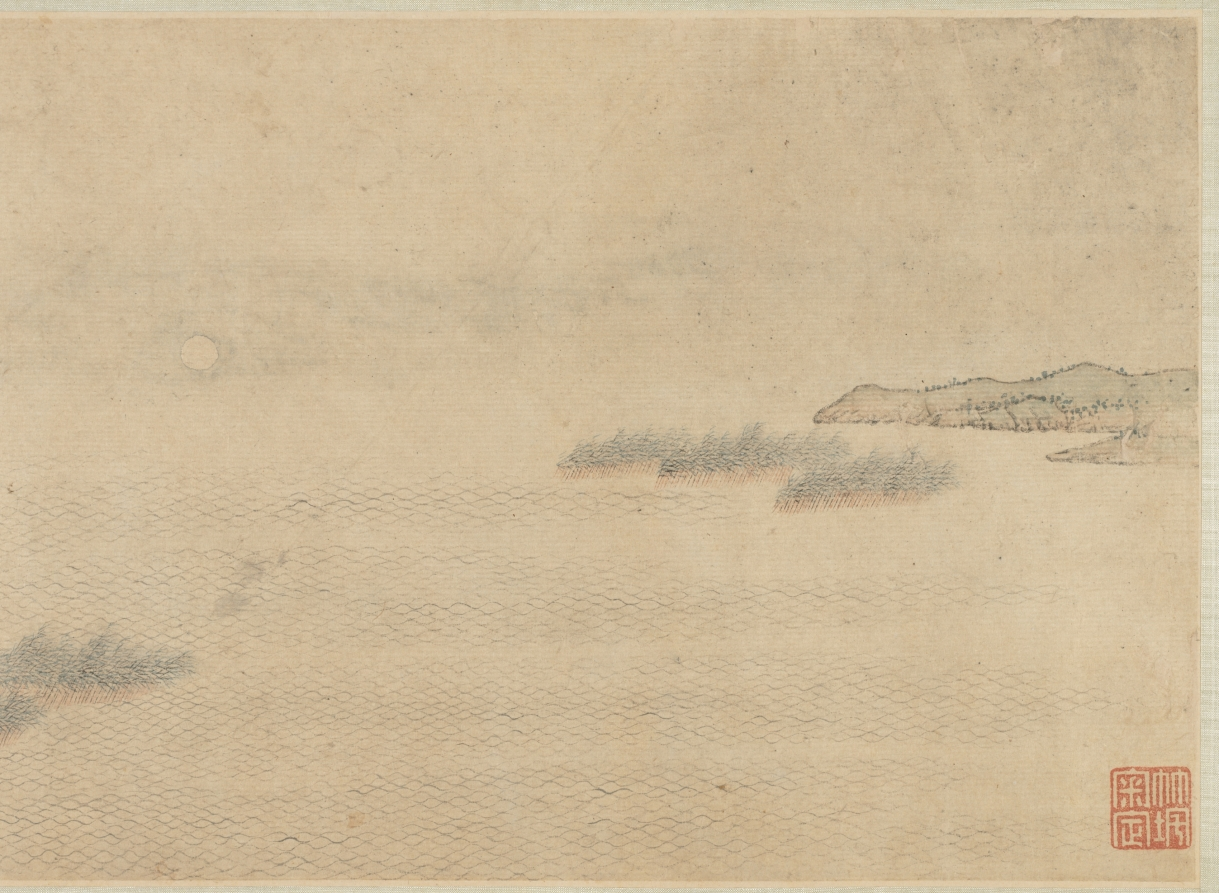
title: Saying Farewell at Xunyang (Song of the Pipa)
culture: China, Ming dynasty (1368–1644)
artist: Wen Boren (Chinese, 1502–1575)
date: 1500s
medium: handscroll, ink and color on paper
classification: Painting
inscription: "潯陽送客圖" 五峰山人文伯仁寫于停雲館中 [印] 文伯仁; 五峰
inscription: 2 colophons and 9 additional seals: 1 transcription of "Pipa xing 琵琶行” (Song of Pipa) and 3 seals of Zhu Yizun 朱彜尊 (1629-1709); 2 seals of Wu Rongguang 吳榮光 (1773-1843); 1 colophon, dated 1826, and 3 seals of Wu Xijia 吳錫嘉 (mid-1700s)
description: This handscroll depicts The Song of the Pipa, a poem by Bai Juyi 白居易 (772–846) written after the poet’s encounter with a pipa player on the Yangzi River. Expelled from her home city when her beauty and fame had faded, she played for the poet at night. Her musical performance and tragic life story resonated with Bai Juyi, who had just been demoted and exiled from life at court himself. The hazy, vast view and pale color tonalities of this painting illustrate these feelings of endless sadness, having lost one’s sense of purpose in life.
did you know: Wen Boren depicted the chilly autumn water with a fishnet pattern.